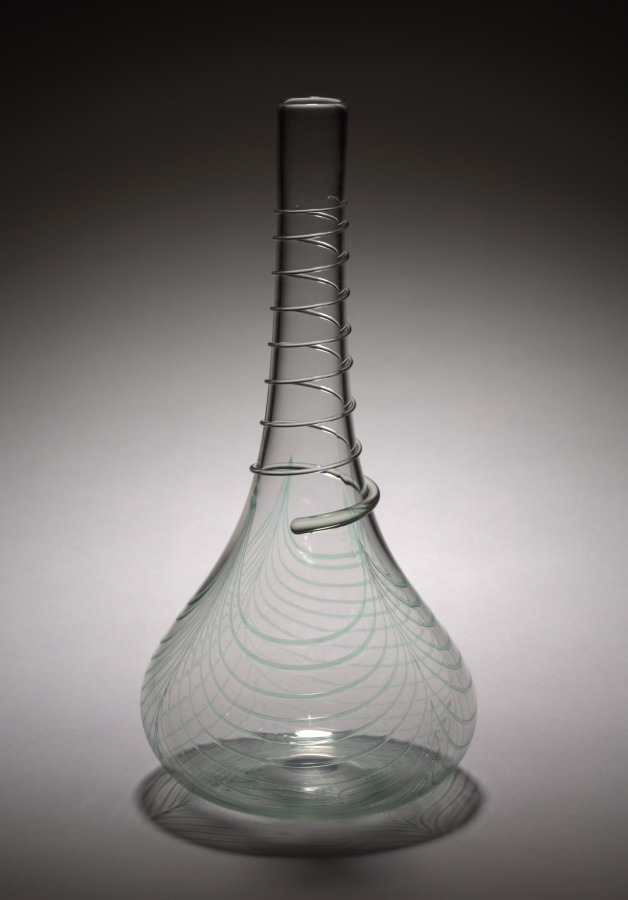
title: Decanter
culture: England, 20th century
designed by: Harry Powell (British, 1835–1922)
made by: Whitefriars Glasshouse (British)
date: after 1902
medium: glass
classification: Glass